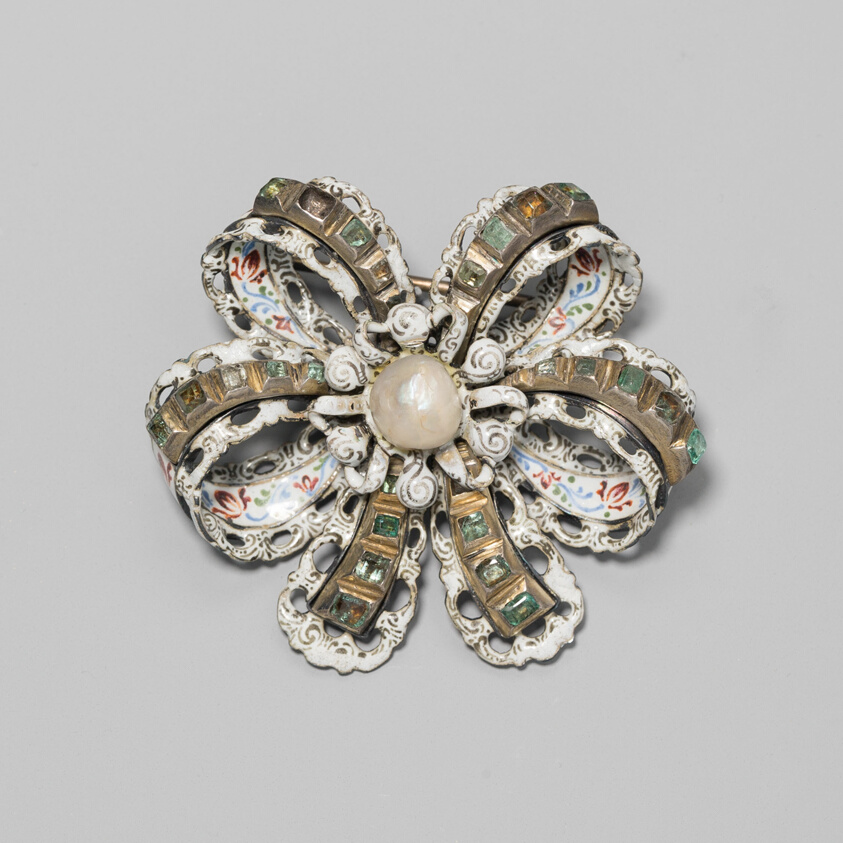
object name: Costume and Accessories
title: Brooch Shaped as a Bow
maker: French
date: 17th or 19th century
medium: Silver gilt, enamel, and aquamarines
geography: France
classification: jewelry; european decorative arts; costume